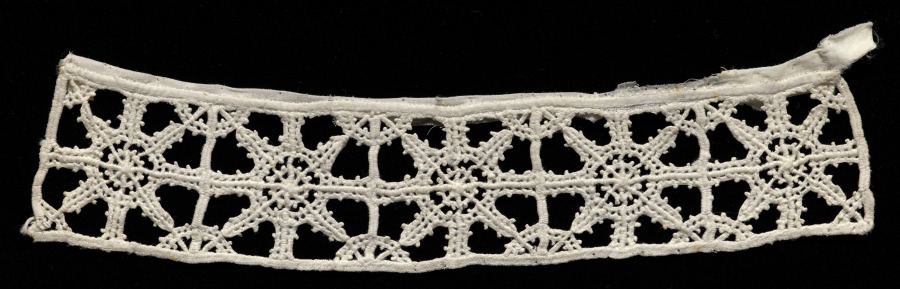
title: Cuff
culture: Italy, Venice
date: 1500s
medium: Linen: needle lace (reticella)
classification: Lace